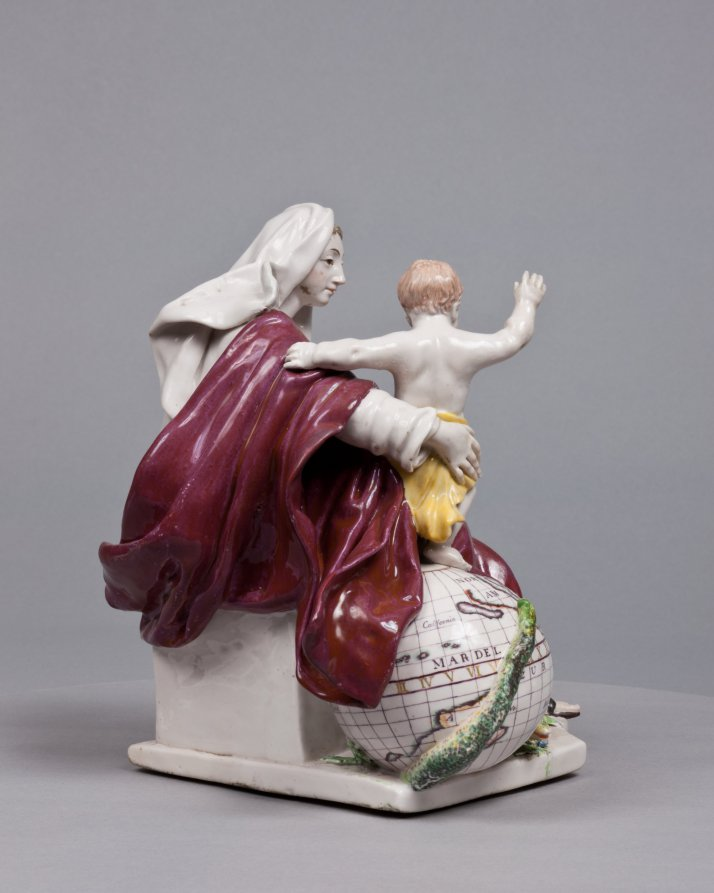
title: Madonna and Child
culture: England, Chelsea, 18th century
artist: Chelsea Porcelain Factory (Britain, London, 1745–84)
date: c. 1755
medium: porcelain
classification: Ceramic